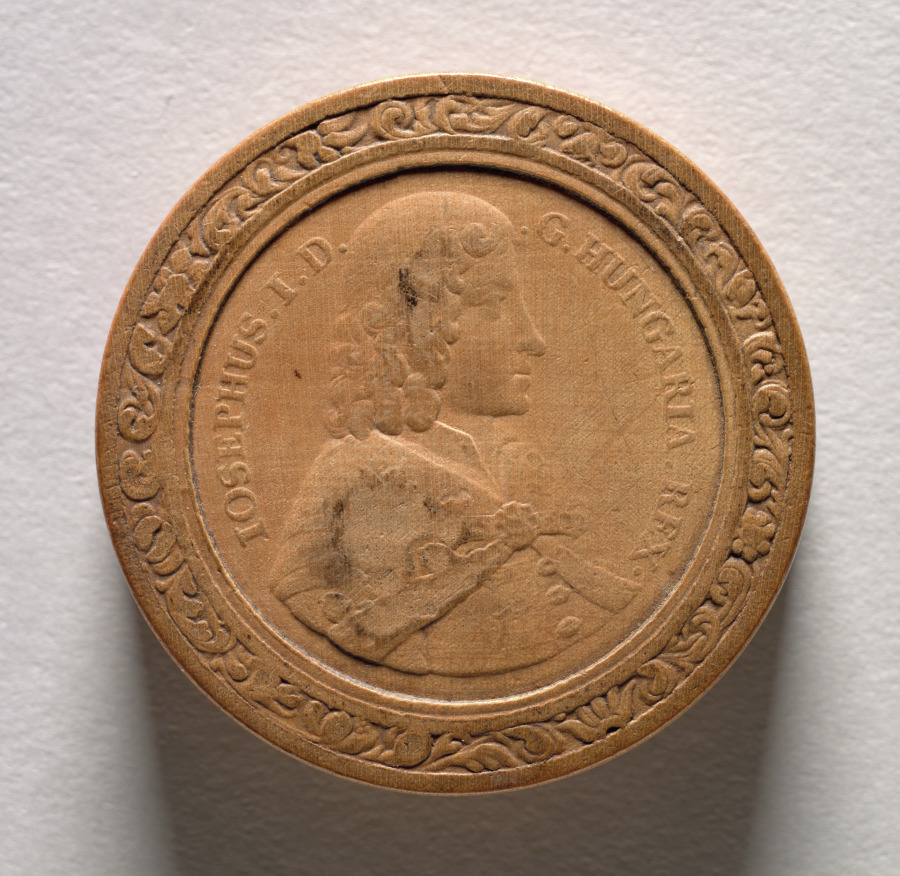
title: Gaming Piece (reverse)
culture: Germany, late 17th-early 18th Century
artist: Martin Brunner (German, 1659–1725)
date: c.1700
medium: wood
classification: Furniture and woodwork